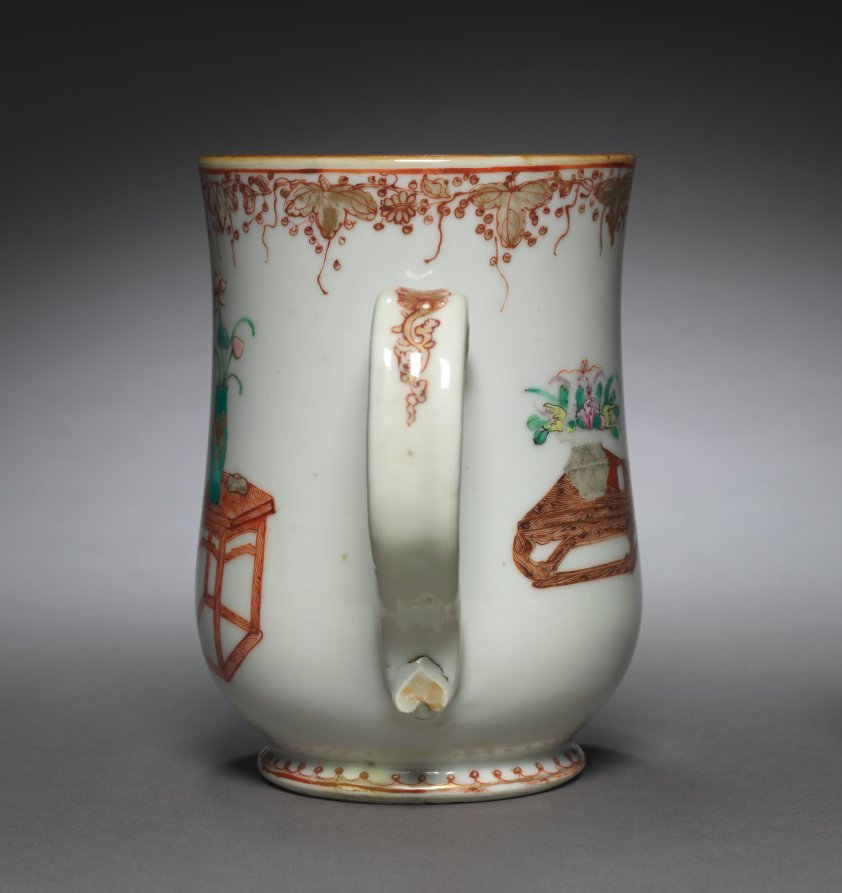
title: Tankard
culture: England, 18th century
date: 1765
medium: ceramic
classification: Ceramic